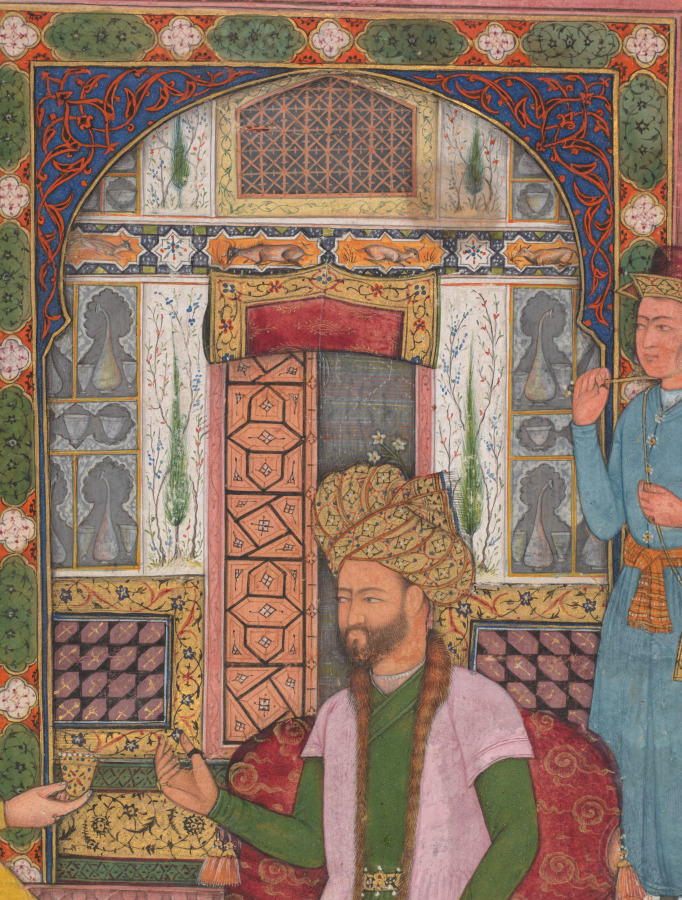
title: A Royal Picnic on a Terrace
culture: Mughal India, court of Akbar (reigned 1556–1605)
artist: attributed to Muhammad Ali (Persian, active 1590–1620)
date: c. 1620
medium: Gum tempera and gold on paper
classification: Painting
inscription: later Hindi inscription on reverse: Babur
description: A richly patterned carpet spans the width of the composition and forms the setting for a royal visit. The status of the highest-ranking person is indicated by the tan cloth placed over the carpet and the voluminous wine-colored cushion ornamented with stylized gold clouds. An attendant holding an emblem of Indian royalty, the fly whisk, stands to one side. At the far right of the carpet are two books, indicating that they are learned men. Like the carpet, the book covers have central medallions and borders, in line with the Persian aesthetic that the Mughals of India held in high regard.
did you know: A gentleman connoisseur has tucked a flowering sprig into his voluminous turban.